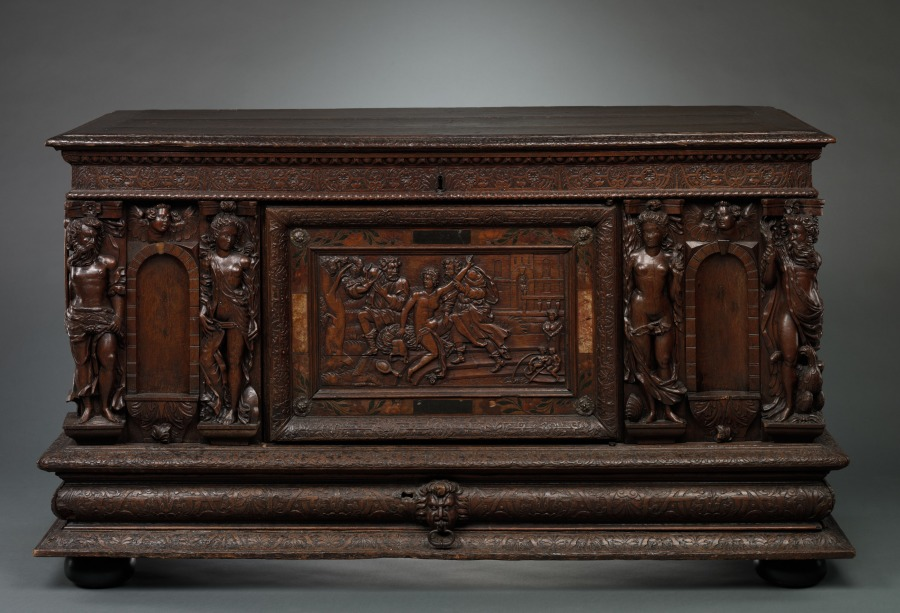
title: Chest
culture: France, Normandy, 16th century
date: 1550–1599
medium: oak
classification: Furniture and woodwork